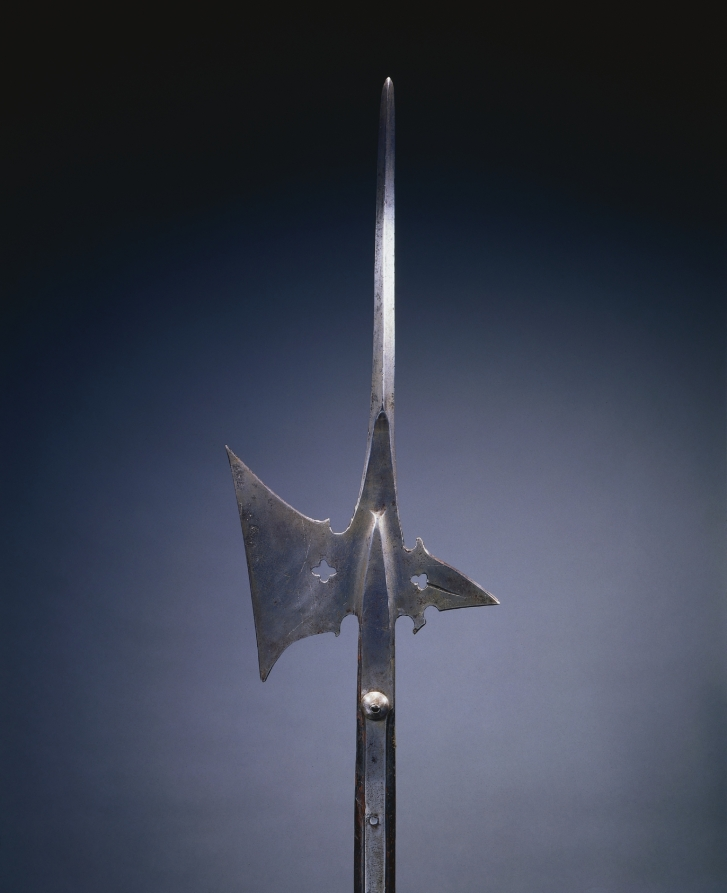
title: Halberd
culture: Germany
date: c. 1520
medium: steel, pierced quatrefoil; rectangular wood haft with planed corners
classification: Arms and Armor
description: The halberd was a staff weapon favored by European infantries (foot soldiers) of the 1400s and 1500s for its versatility and deadly effect. The word halberd comes from the German words Halm (staff) and Barte (axe). The halberd is, in fact, an axe that served multiple functions: the axe blade was used for hacking, the spike for thrusting, and the beak for piercing plate armor or for pulling a knight from his saddle. The halberd was used by shock troops (those who lead an attack) and by Swiss and German mercenaries. After about 1550, the halberd gradually became less functional. Its large blade provided space for coats of arms and insignia. By the late 1500s, the parade halberd had become a ceremonial weapon for palace guards.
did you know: A halberd requires the use of both hands and so a halberdier cannot carry a shield for protection.